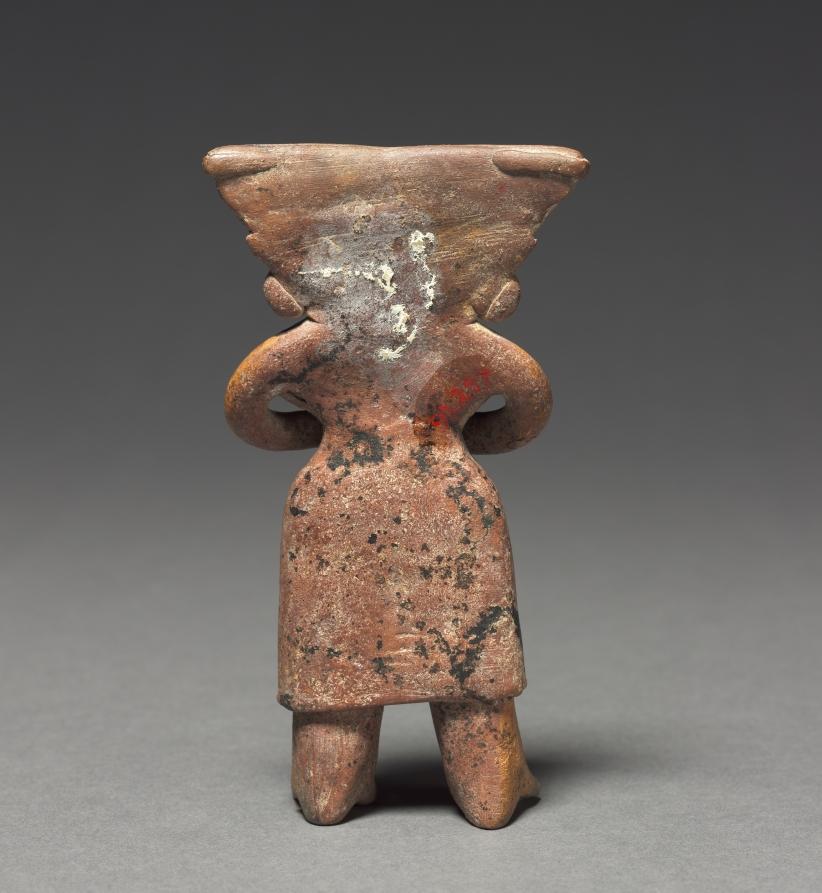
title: Female Figurine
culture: Mexico, Michoacán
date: 100 BCE–300 CE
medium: earthenware with pigment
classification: Sculpture